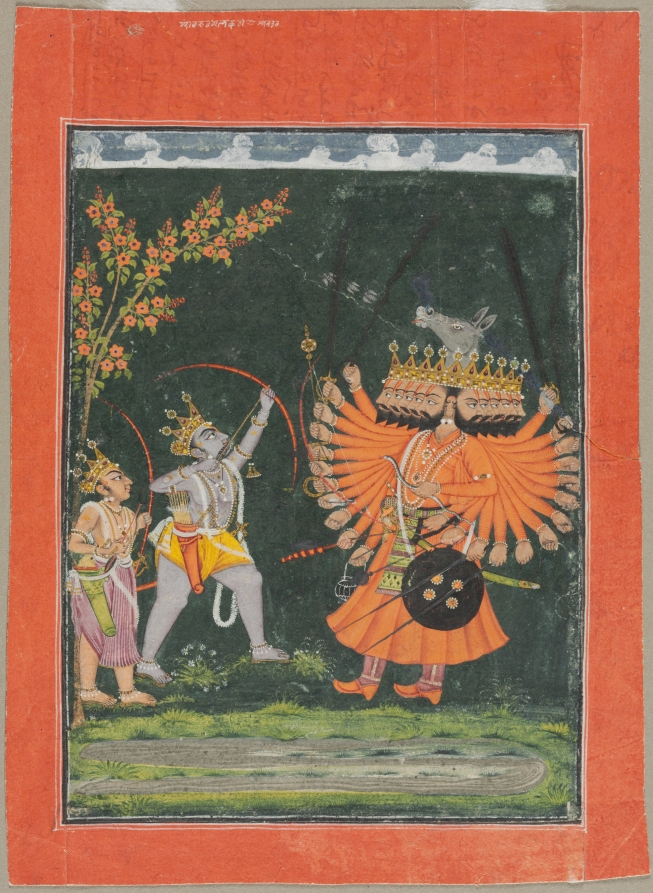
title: Rama and Lakshmana Fighting Ravana, from a Dashavatara (Ten Incarnations [of Vishnu]) series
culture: Northern India, Pahari Region, Himachal Pradesh, Rajput Kingdom of Chamba, Court of Raj Singh (reigned 1764–94)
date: c. 1765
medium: Gum tempera and gold on paper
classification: Painting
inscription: [[top border, in Takri]] sri raja ram lachhamana avatara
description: Against the dark green and foreboding landscape, the final and much-anticipated battle between the demon king Ravana and the mighty princes Rama and Lakshmana unfolds. Ravana wields twenty weapons, including a poisonous snake in his front left hand. The blue Rama aims an enchanted crescent-shaped arrow at bees emitted from the donkey head at the apex of Ravana’s ten crowns. The arrow and bees stand for powerful mantras, or magical incantations, that can destroy one’s enemies. The impending defeat of Ravana will fulfill the purpose of Vishnu’s incarnation as Rama.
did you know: Rama and Lakshmana wield divine bows in their fight against the ten-headed demon Ravana.